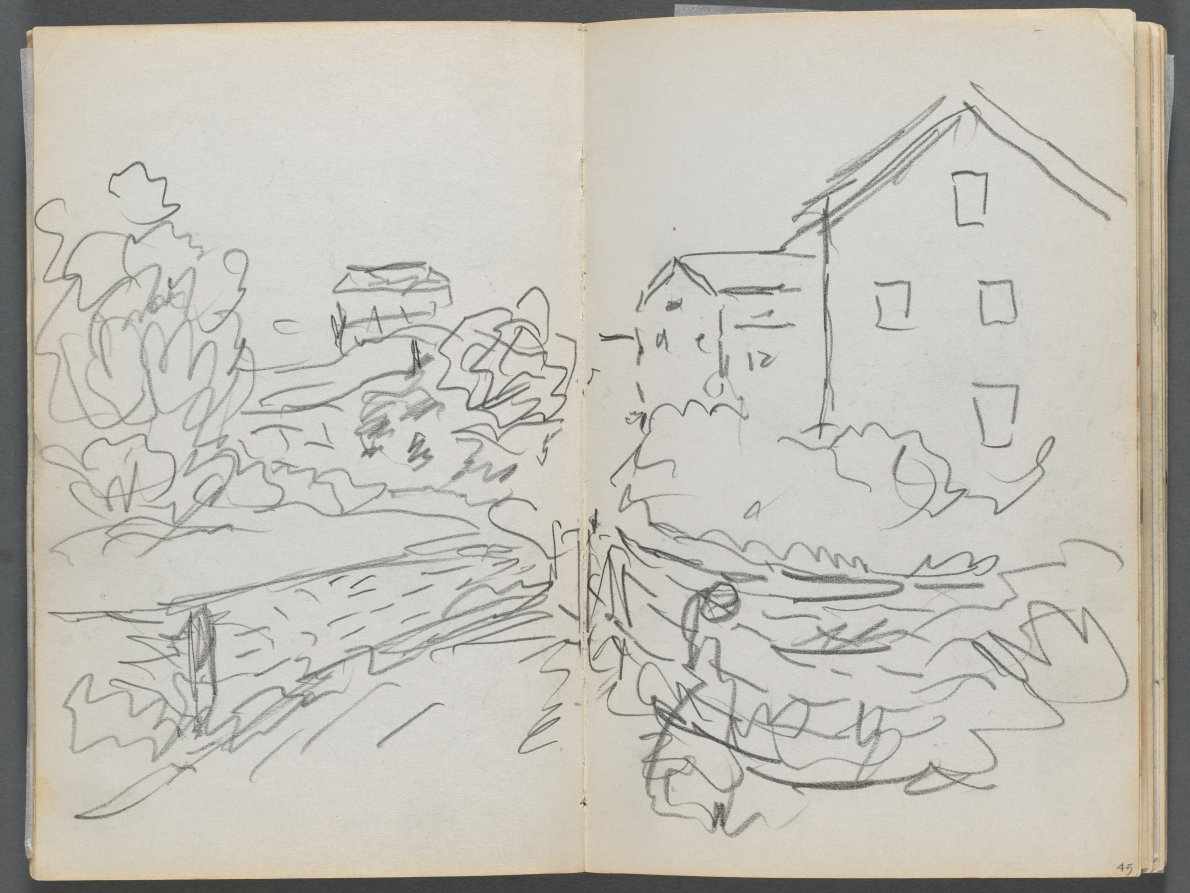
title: Sketchbook, The Dells, N° 127, page 044 & 45: Landscape with Houses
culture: America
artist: Maurice Prendergast (American, born Newfoundland [now Canada], 1858–1924)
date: c. 1919–1921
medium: graphite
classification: Bound Volume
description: This sketchbook contains 59 pages of graphite drawings and 16 watercolors made at various locations on Cape Ann, Massachusetts.